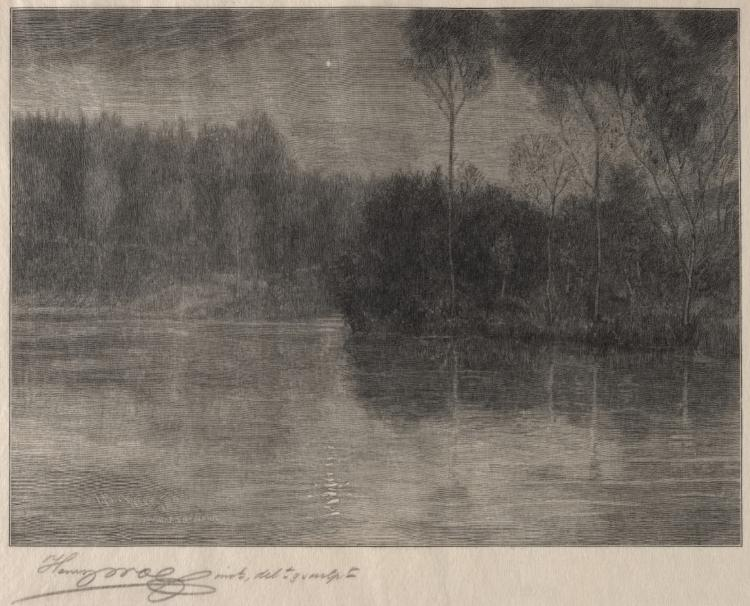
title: The Morning Star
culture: America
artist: Henry Wolf (American, 1852–1916)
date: 1903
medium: wood engraving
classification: Print